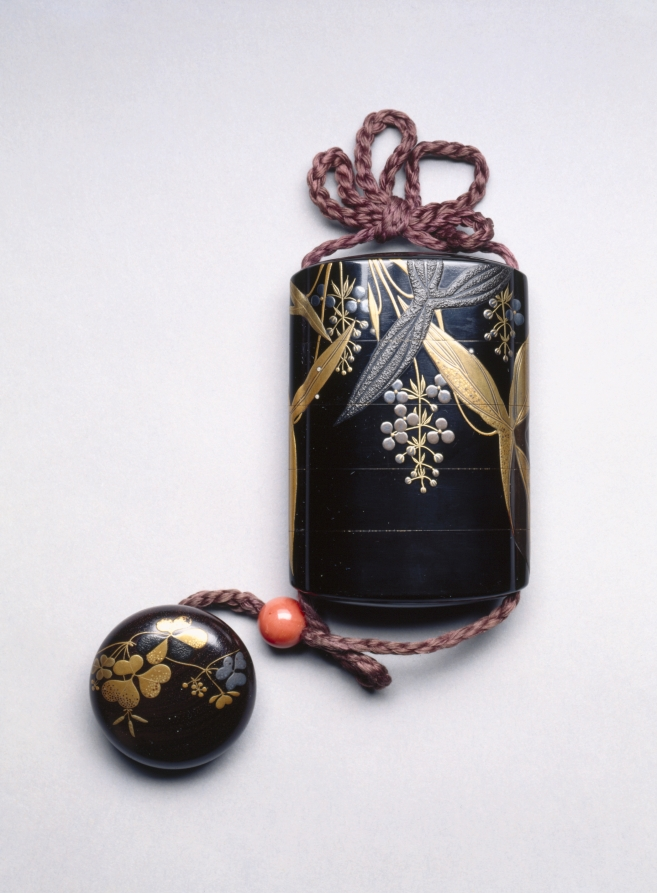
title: Inro, Ojime, Netsuke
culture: Japan, Edo period (1615–1868) to Meiji period (1868–1912)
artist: Shibata Zeshin (Japanese, 1807–1891)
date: later 1800s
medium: lacquer with sprinkled gold, silver, and mother-of-pearl design, coral, and wood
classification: Lacquer